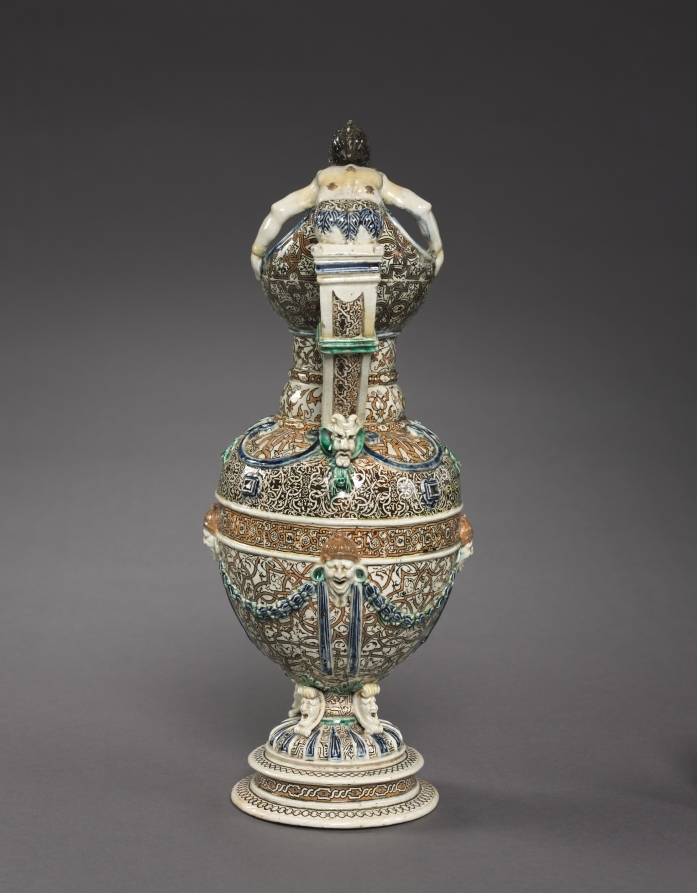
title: Ewer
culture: France, 16th century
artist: Saint-Porchaire (French)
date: c. 1540–67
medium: lead-glazed, white-paste earthenware with inlaid slip decoration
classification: Ceramic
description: An example of one of the most extravagant wares of this kind, this ewer is decorated with applied masks and frogs as well as a variety of stamped and inlaid designs. The shape and patterns reflect the metalwork of the time—the final period of this artistic pottery.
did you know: The green tree frog was one of the symbols of French King Henri II, indicating that this ewer may have either been made for the king or one of his courtiers.